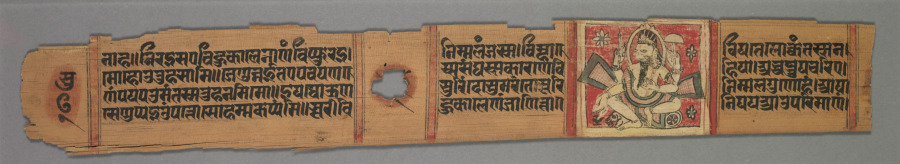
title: Brahmanshanti Yaksha: Folio (verso), from a Kalpa-sutra and Story of Kalaka of Devachandra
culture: Western India, Gujarat, 13th century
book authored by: Devachandra (Indian)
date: 1279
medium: gum tempera and ink on palm leaf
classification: Painting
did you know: In Jainism, yakshas communicate between humans and beings in the eternal realm of liberation.